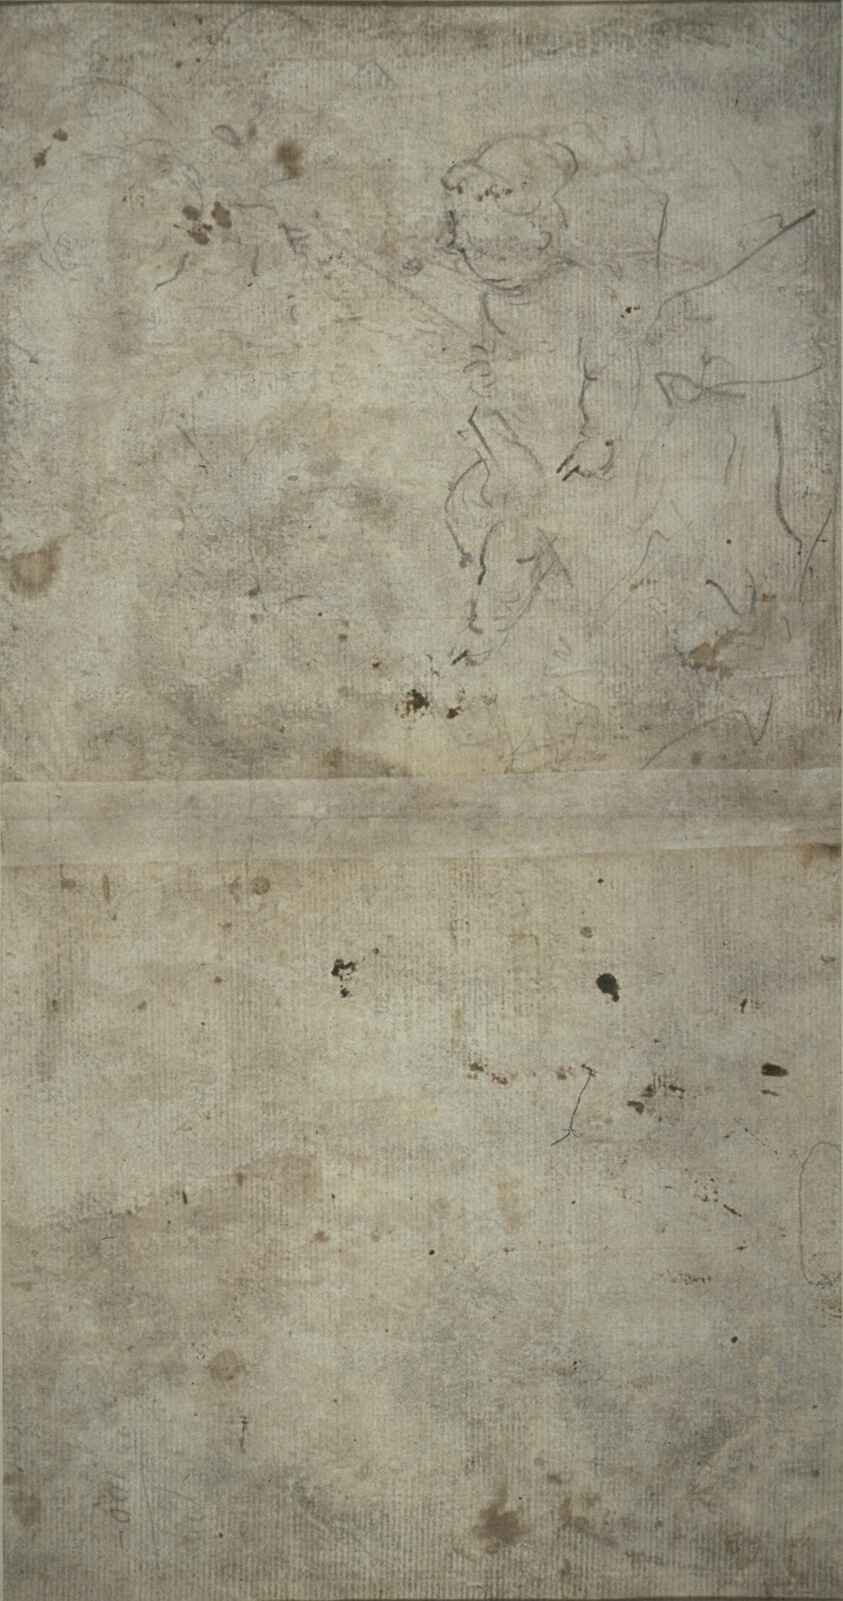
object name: Drawing and Watercolor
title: Sketch of Joseph Holding the Christ Child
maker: Giovanni Antonio Guardi (Italian, 1699-1760)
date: c. 1750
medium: Charcoal on ivory laid paper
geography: Italy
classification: drawings (visual works); prints and drawing